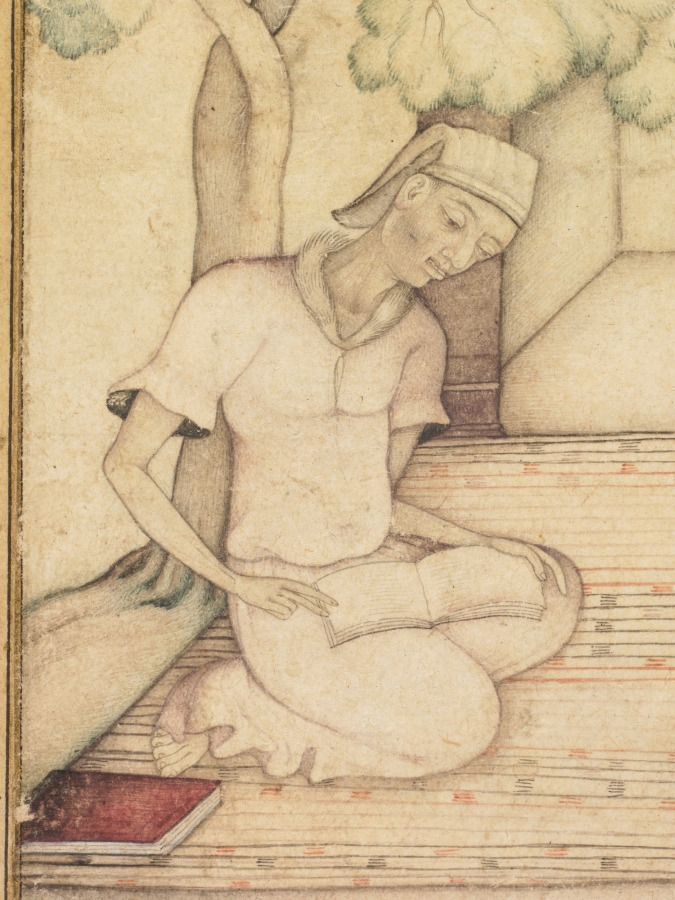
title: Kabir and Two Followers on a Terrace (recto)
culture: India, Mughal, 17th century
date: c. 1610–1620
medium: Gum tempera, ink, and gold on paper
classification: Painting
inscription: verso: four lines of nast 'aliq calligraphy with illuminated panels, with illuminated panels, ink gold and opaque watercolor on paper